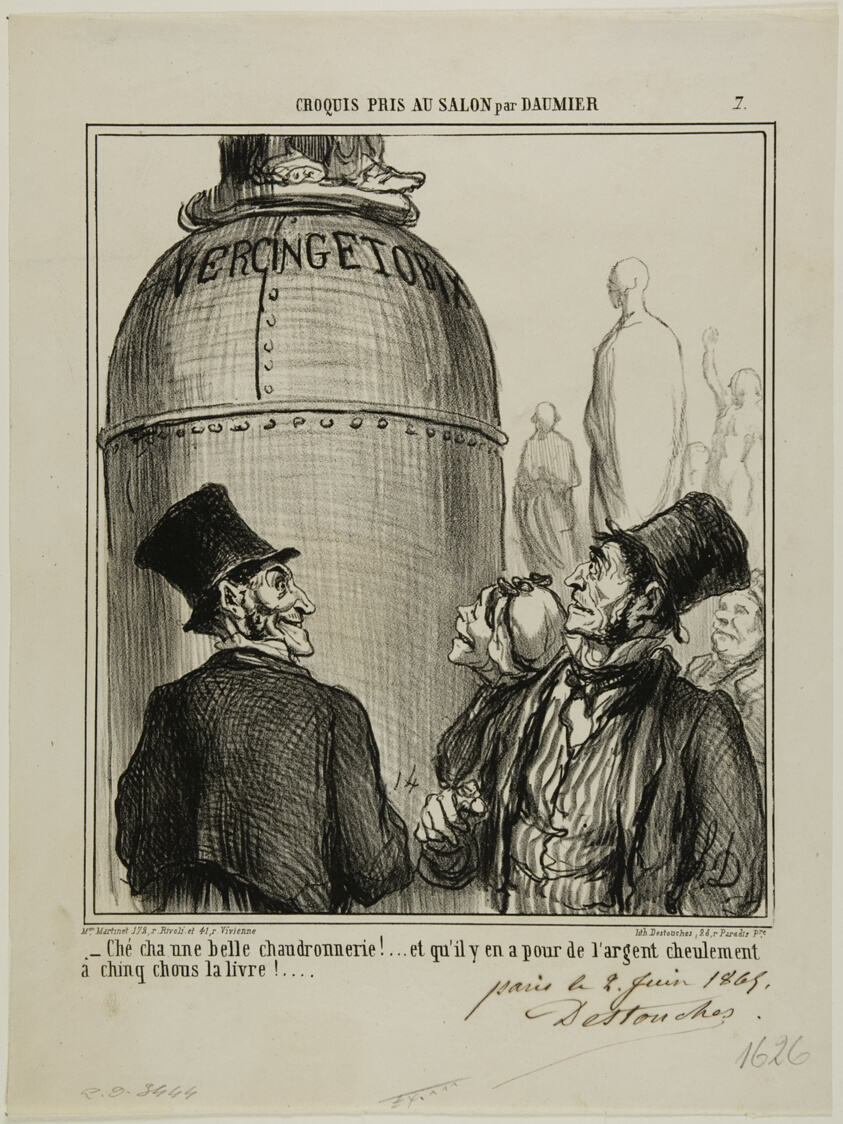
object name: Print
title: “- Yep... this is what I call a shplendid job.... and for just five sous per pound.. you reaaalllly get your money's worth!,” plate 7 from Croquis Pris Au Salon par Daumier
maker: Honoré Victorin Daumier; French, 1808-1879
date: 1865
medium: Lithograph in black on white wove paper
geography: France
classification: lithograph; print; prints and drawing